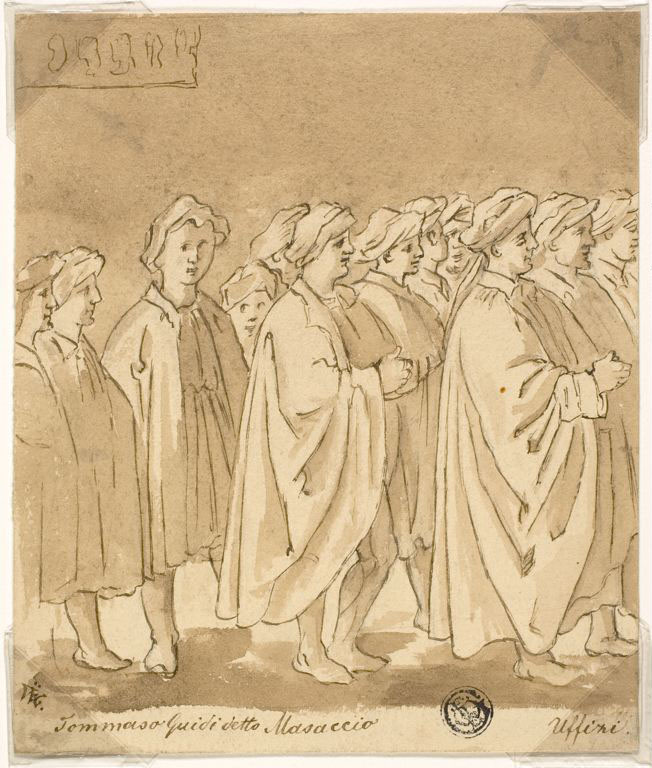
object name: Drawing and Watercolor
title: Procession of Figures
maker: After Masaccio; Italian, 1401-1428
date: 18th/19th century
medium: Pen and brown ink, with brush and brown wash, over graphite, on cream wove paper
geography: Italy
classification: ink with wash; drawings (visual works); prints and drawing